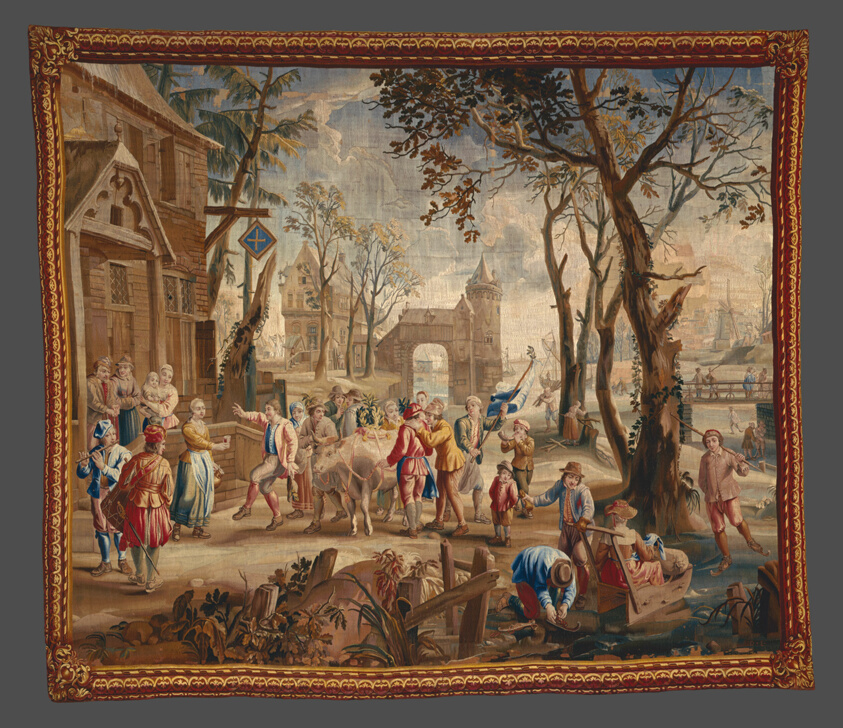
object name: Textile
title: Procession of the Fat Ox from a Teniers Series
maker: After a design by Jan van Orley (Flemish, 1665–1735); Woven at the workshop of Daniel IV Leyniers (Flemish, 1705–1770); Flanders, Brussels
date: c. 1725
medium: Wool and silk, slit and double interlocking tapestry weave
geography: Brussels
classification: weaving - tapestry; textile